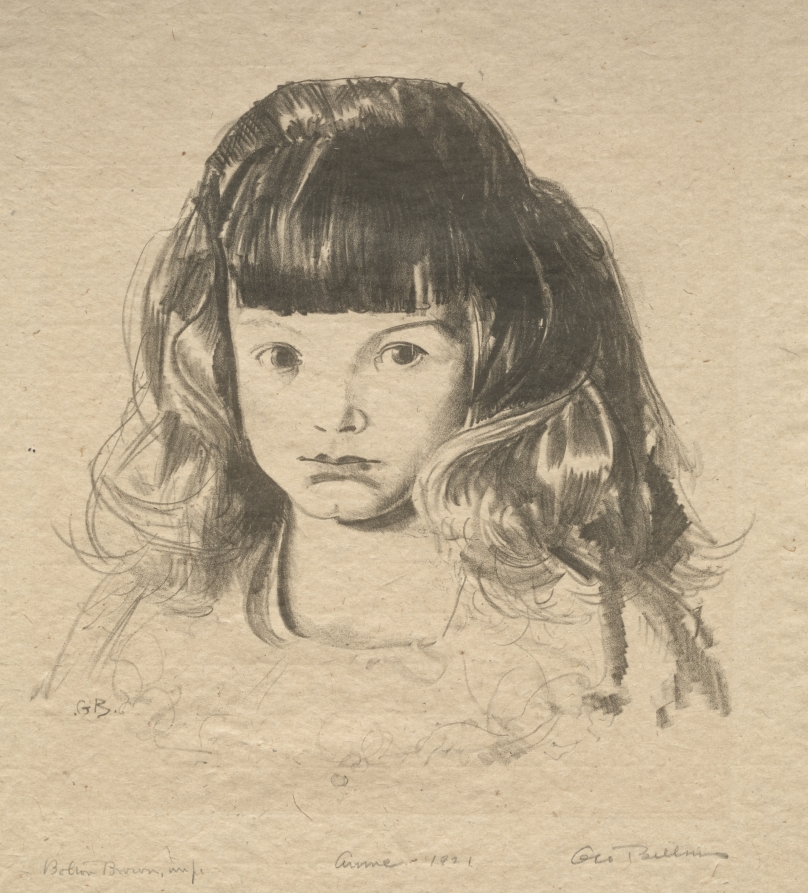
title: Anne 1921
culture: America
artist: George Bellows (American, 1882–1925)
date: 1923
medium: lithograph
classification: Print